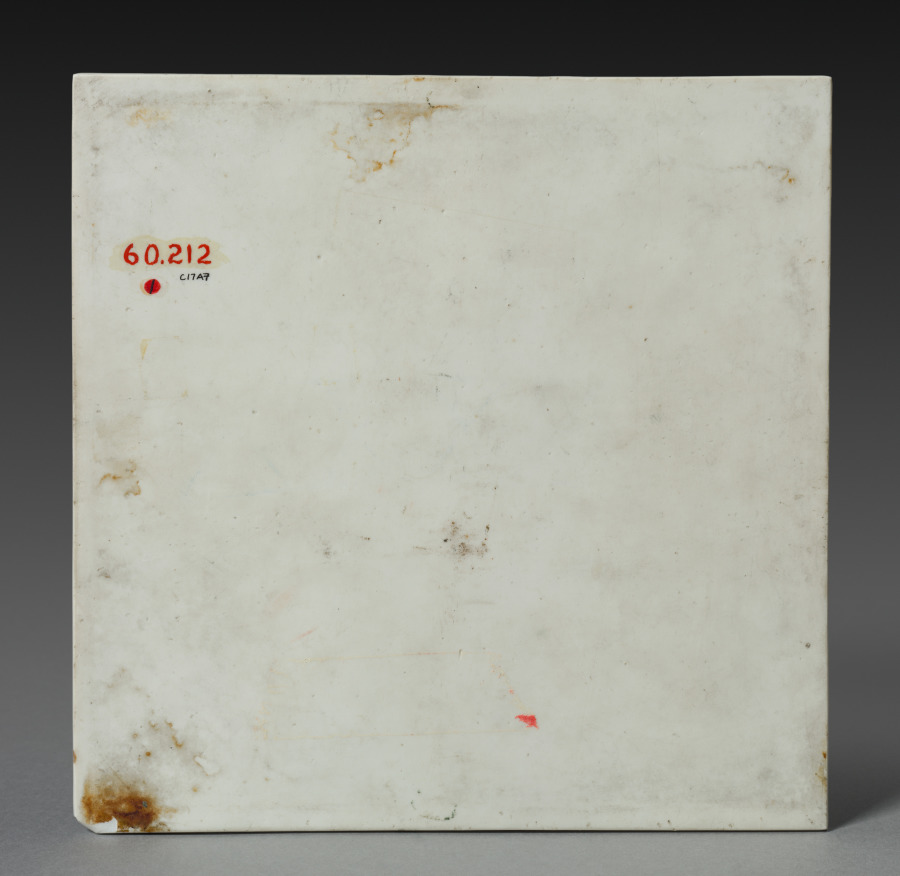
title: Plaque with Quail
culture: Japan, Meiji period (1868–1912) or Taishō period (1912–26)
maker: Katō Zenji 3 (Japanese, 1848–1918)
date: late 1800s–early 1900s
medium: overglaze enamel porcelain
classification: Ceramic